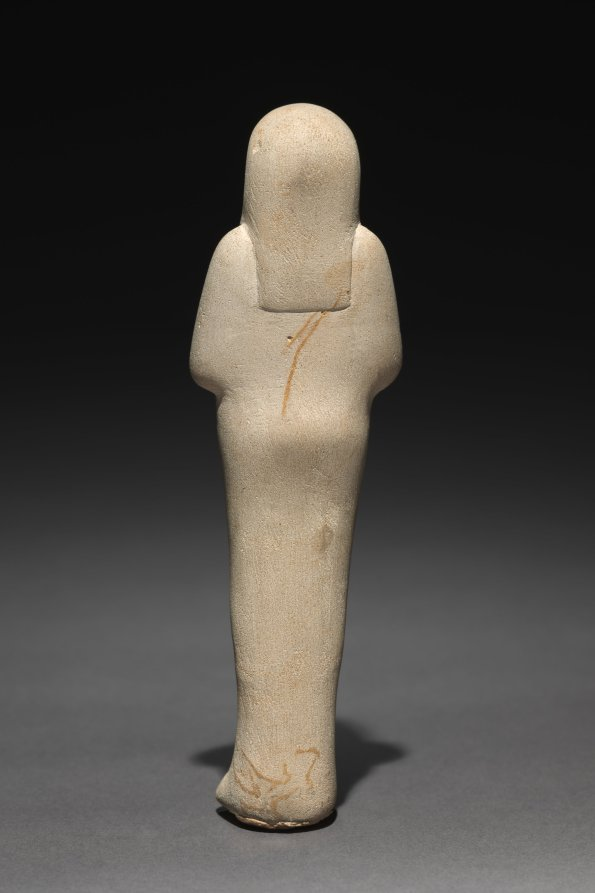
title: Shawabty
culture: Egypt, Modern forgery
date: forgery of the early 20th century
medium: limestone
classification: Funerary Equipment